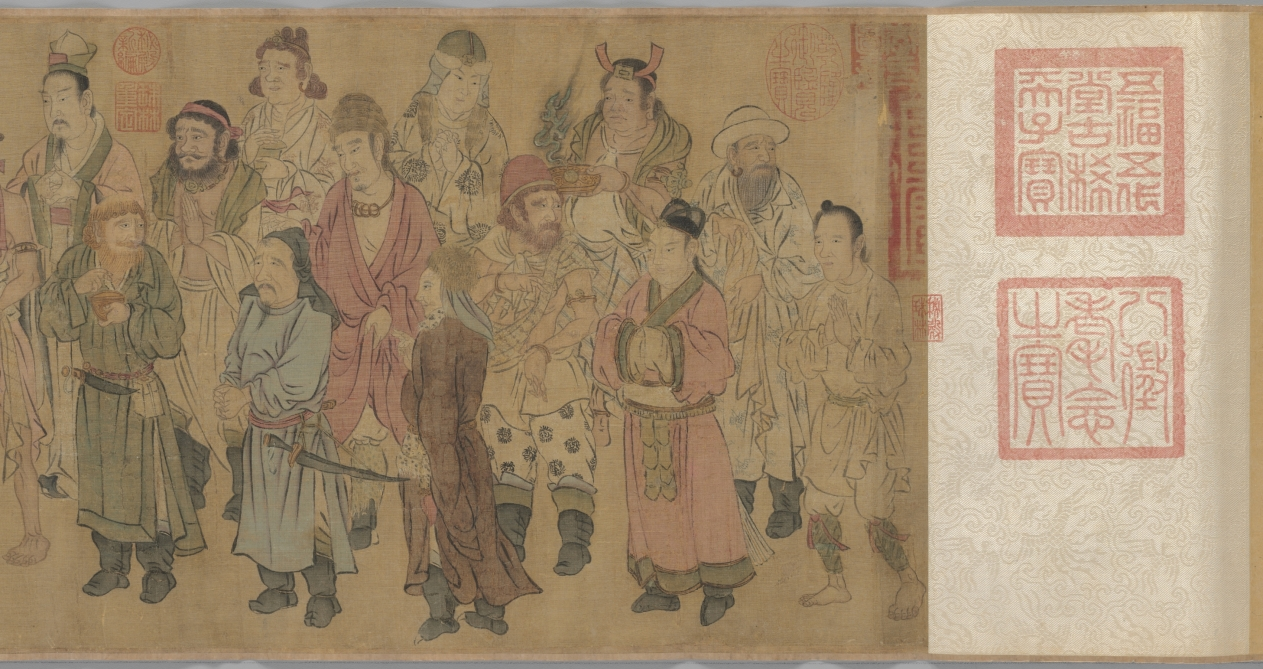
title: Barbarian Royalty Worshiping the Buddha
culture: China, Northern Song dynasty (960-1127)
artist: attributed to Zhao Guangfu (Chinese, c. 923–976)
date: 900s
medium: Handscroll; ink and color on silk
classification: Painting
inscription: 佛法入中國千餘年。殆是家有其像。見之者悉起敬心，不當以古今畫手分別也。 子昂 [印]趙氏子昂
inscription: Colophon by Guo Bi (1280–1335): A transcription of "Zheng fa yan zang ming bing xu" 正法眼藏銘幷序 by Wuwei Jushi 無為居士. Signature: Situi Jushi Guo Bi 思退居士郭畀. 2 seals.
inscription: Spurious artist's signature: Zhao Guangfu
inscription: 1 seal of the Li family (Yuan Dynasty)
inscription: 14 seals of Qianlong Emperor (r. 1736–95)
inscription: 1 seal of Jiaqing Emperor (r. 1796–1820)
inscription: 1 seal of Xuantong Emperor (r. 1909–11)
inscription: 1 official seal of the Yuan dynasty, “Tian li zhi bao 天曆之寶” (Treasure of Tianli).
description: This painting begins on the right with 15 people following a dignified figure wearing headgear with twin pheasant feathers. He extends an incense burner toward the Buddha, who is seated on his lotus throne and flanked by two haloed disciples and two Heavenly Kings. The worshipers’ diverse physical features, regional finery, and religious affiliations suggest the universal appeal of Buddhism. The imagery was inspired by the foreign envoys who frequently came to the Chinese court to give tribute to the emperor. At the time, all outsiders were considered “barbarians,” so their presence was seen as acknowledgment of China’s political and cultural power.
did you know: Sixteen "barbarians" pay homage to the Buddha, who is seated on a lotus throne with two disciples and two guardians.